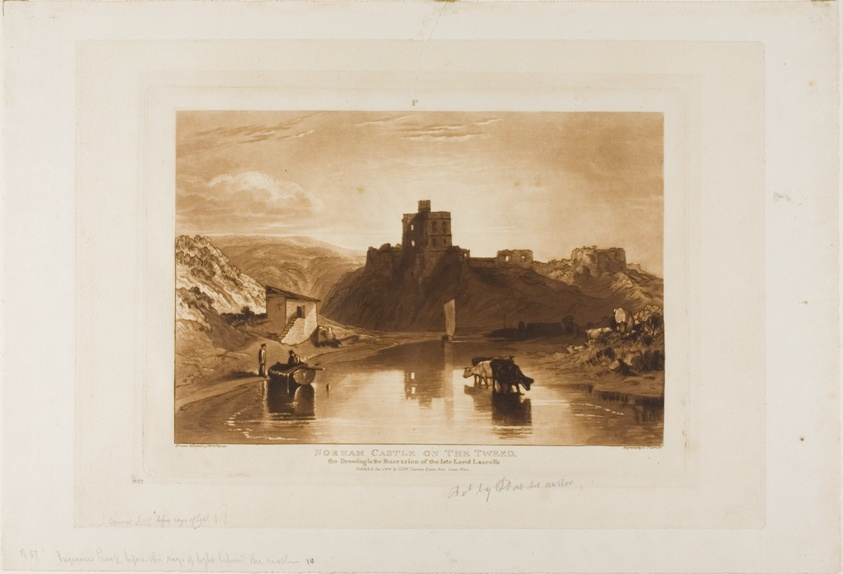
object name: Print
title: Norham Castle, plate 57 from Liber Studiorum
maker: Joseph Mallord William Turner (English, 1775-1851); Engraved by Charles Turner (English, 1773-1857)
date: published January 1, 1816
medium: Etching and engraving in brown on ivory wove paper, laid down on ivory paper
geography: England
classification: mezzotint; print; prints and drawing